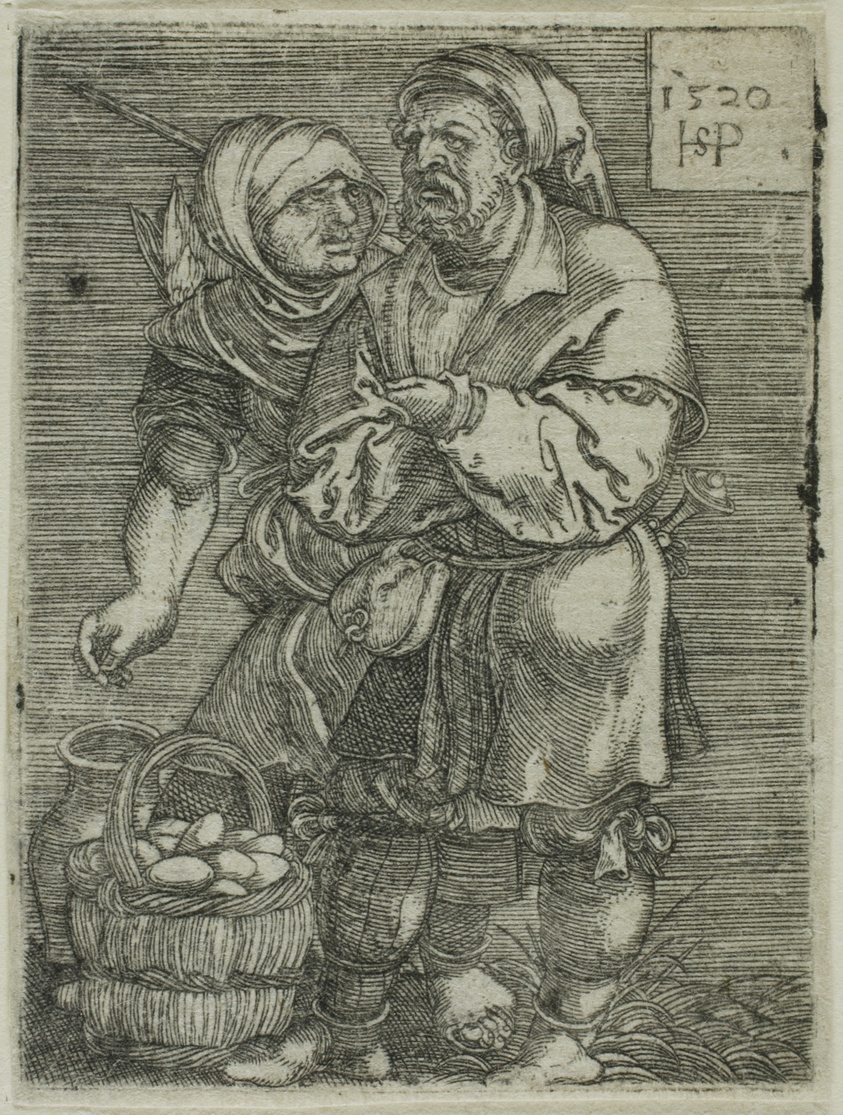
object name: Print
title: Peasant Couple Selling Eggs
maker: Sebald Beham; German, 1500-1550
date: 1520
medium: Etching in black on ivory laid paper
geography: Germany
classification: engraving; print; prints and drawing